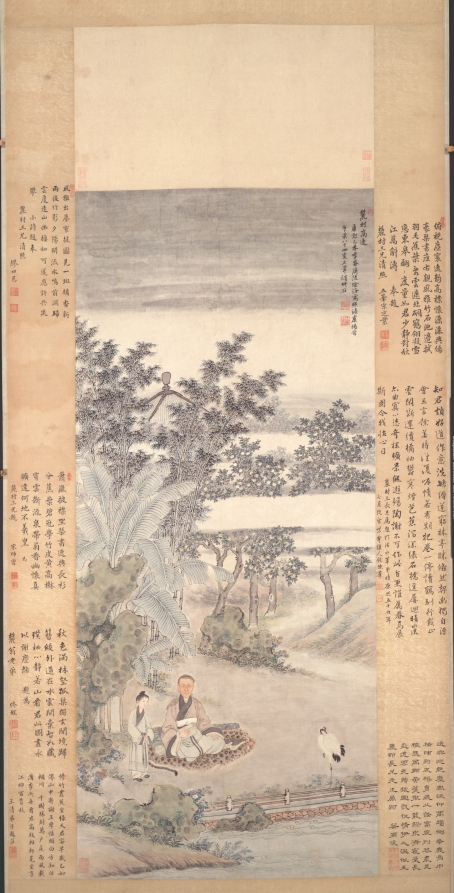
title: Portrait of An Qi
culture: China, Qing dynasty (1644-1911)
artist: Wang Hui (Chinese, 1632–1717)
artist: Tu Luo (Chinese, active c. 1715)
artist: Yang Jin (Chinese, 1644–1728)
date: 1715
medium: hanging scroll; ink and color on paper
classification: Painting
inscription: [印]上下千年. 麓村高逸：康煕乙未季春，廣陵涂洛寫照，海虞楊晉布景，八十四叟王翬補竹石。[印]耕煙; 王翬之印.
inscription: 俯視塵寰逸韻高，襟懷潚灑興偏豪。/ 琴書座右親風雅，竹石池邊拭羽毛。/ 蕉葉亂雲遮北礀，鶴翎凝雪戀東皋。/ 翩翩度量如君少，靜對秋江萬斛濤。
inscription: 知君頗好道，作意洗緐縟。/ 遂窮林亭勝，翛然契幽獨。/ 自得會忘言，餘善時往復。/ 岸幘若有期，把卷一停讀。/ 鶴馴行載正，雲閑斷還續。/ 橘柚欎寒煙，芭蕉瀉深綠。/ 石橋逕屢迴，暗水流亦曲。/ 真心恣奇探，曠景縱遐矚。/ 陶謝不可作，此旨更誰屬。/ 眷焉展斯圖，令我怡心目。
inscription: 逸興迥絶塵，風流仰高躅。/ 側無鹿角巾，横呈豹皮褥。/ 胸藏山壑富，座列琴囊足。/ 橙懸萬顆黄，蕉散一叢綠。/ 泉清鶴景長，樹遠雲光續。/ 披圖識性情，伊人温似玉。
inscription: 風雅出塵寰，披圖見一斑。/ 橘香新雨後，竹影夕陽間。/ 流水鳴前澗，歸雲渡遠山。/ 幽棲如可遂，應許共追攀。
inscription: 蕭灑披襟坐，琴書逸興長。/ 衫分蕉葉碧，冠學竹皮黄。/ 高樹穿雲斷，流泉帶菊香。/ 幽懷真曠達，何地不羲皇。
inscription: 秋色滿林壑，孤琴獨玄閒。/ 境歸簪紱外，道在水雲間。/ 棄智如藏璞，栖心静若山。/ 看君此圖畫，永以謝塵顏。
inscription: 修竹叢蕉坐綠天，君容早歳已如仙。/ 山中寄謝王摩詰，頭白方知住輞川。/ 千樹勝封萬戸侯，西風載滿李衡舟。/ 看君高致輕軒冕，坐享江鄉富貴秋。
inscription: 6 seals unidentified.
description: An Qi, the subject of the portrait, was a second-generation salt merchant from Korea. He used part of his wealth to collect art. At the time this painting was commissioned, An was less than 40 years old. He is represented as a Daoist recluse in nature, informally dressed with attributes such as books and a wrapped guqin instrument, a portrait convention for literati-scholars since the Six Dynasties period (220–589 CE). The local Taihu rock, banana plants, and crane suggest a southern garden and a life in seclusion. An’s portrait is evidence of merchants aspiring to the scholar-official class. According to the inscription, this painting was the joint effort of three men, the eldest and most famous was Wang Hui. While the garden setting is homogenous in style, it contrasts with the application of opaque pigments and shading employed for the depiction of An Qi’s face.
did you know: Seven of An Qi's close friends wrote poetic inscriptions on the silk brocade mount around his portrait.